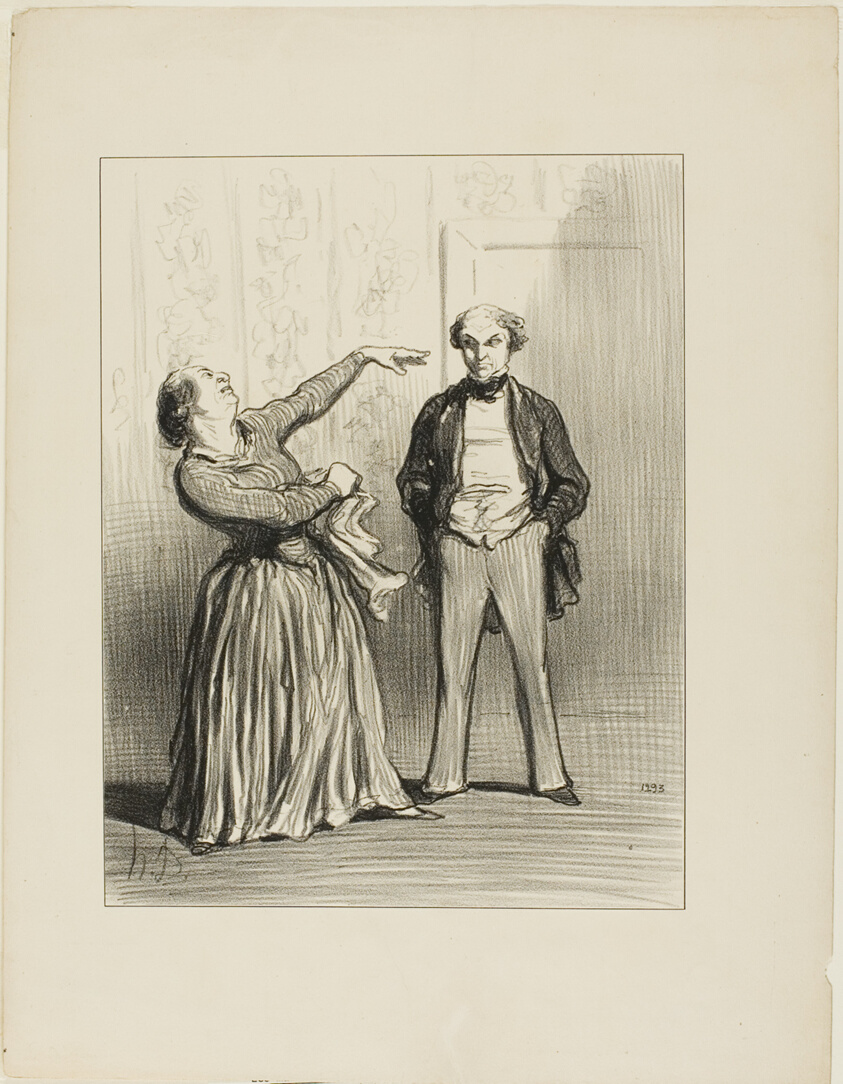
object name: Print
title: “- Husbands are really not what a vain people likes to believe!,” plate 3 from Les Divorceuses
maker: Honoré Victorin Daumier; French, 1808-1879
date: 1848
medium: Lithograph in black on ivory wove paper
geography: France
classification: lithograph; print; prints and drawing